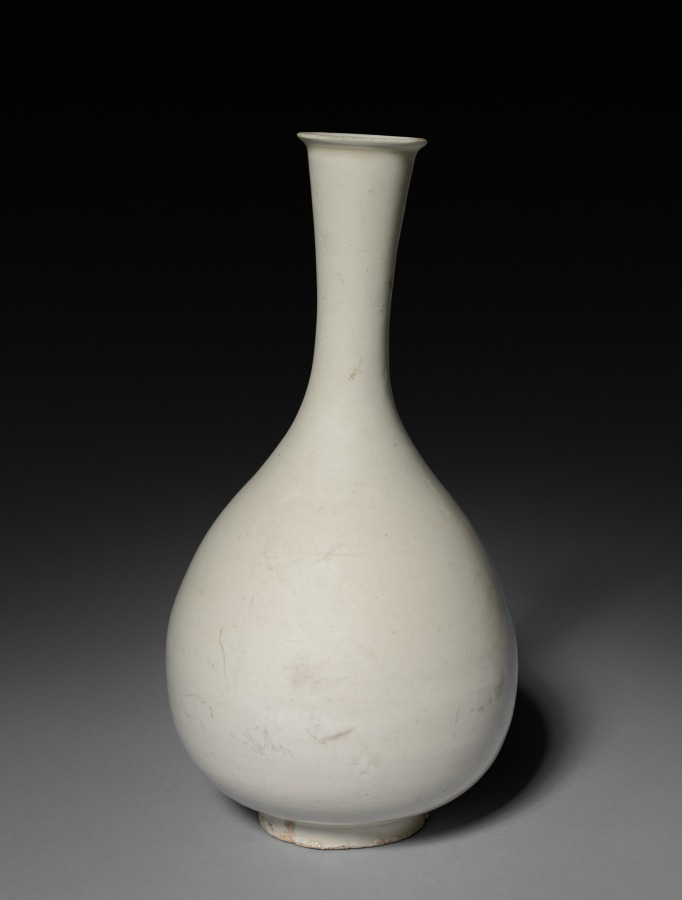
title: Bottle Vase: Ding ware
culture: China, Jin dynasty (1115-1234)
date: 12th Century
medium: glazed white porcelain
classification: Ceramic